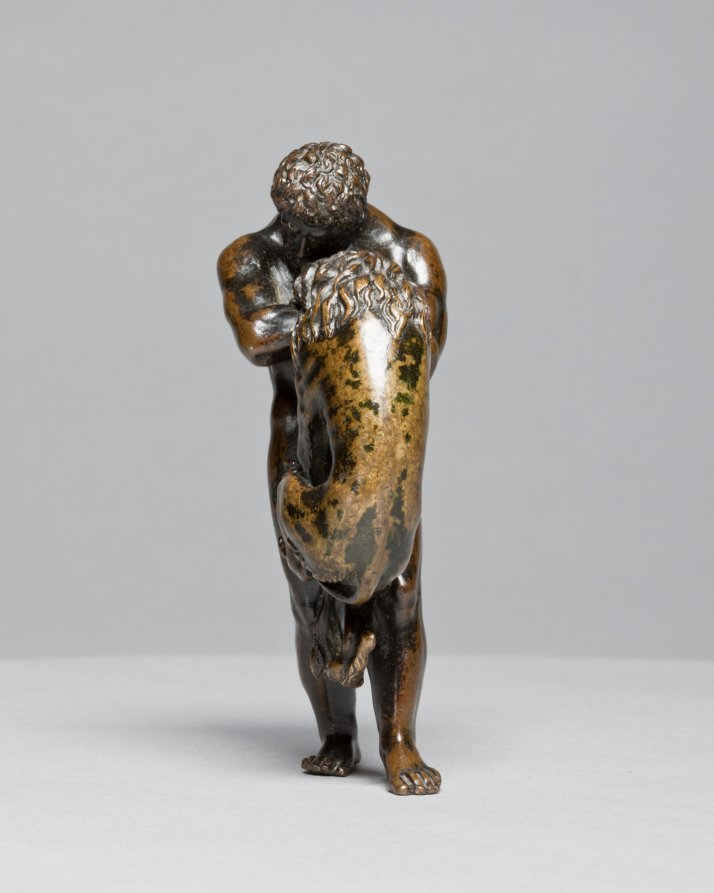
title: Hercules and the Nemean Lion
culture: Italy or France, 16th century or later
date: 1500s or later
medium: bronze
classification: Sculpture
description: The original owner of this work would have understood that this scene referred to the entire story of Hercules, the demi-god who had to accomplish twelve labors. The lion is named after the city of Nemea, near Corinth, a monstrous beast sent by the goddess Hera to wreak havoc on the area. After killing the lion, Hercules wore his pelt, commonly seen in other representations of the hero.